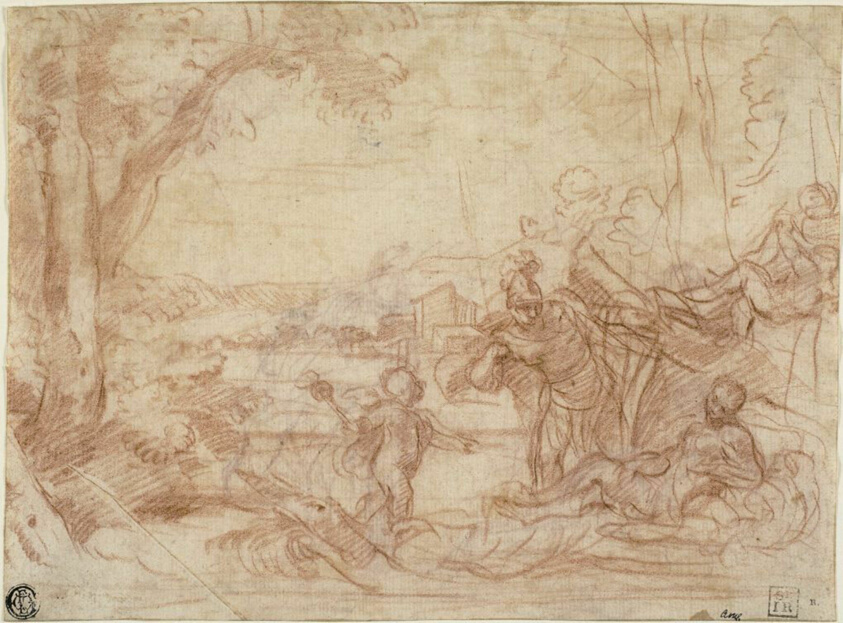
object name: Drawing and Watercolor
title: Mars and Venus (recto and verso)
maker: Guillaume Courtois (French, 1628-1679, active in Italy)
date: 1648/79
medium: Red chalk on ivory laid paper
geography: France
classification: chalk; drawings (visual works); prints and drawing